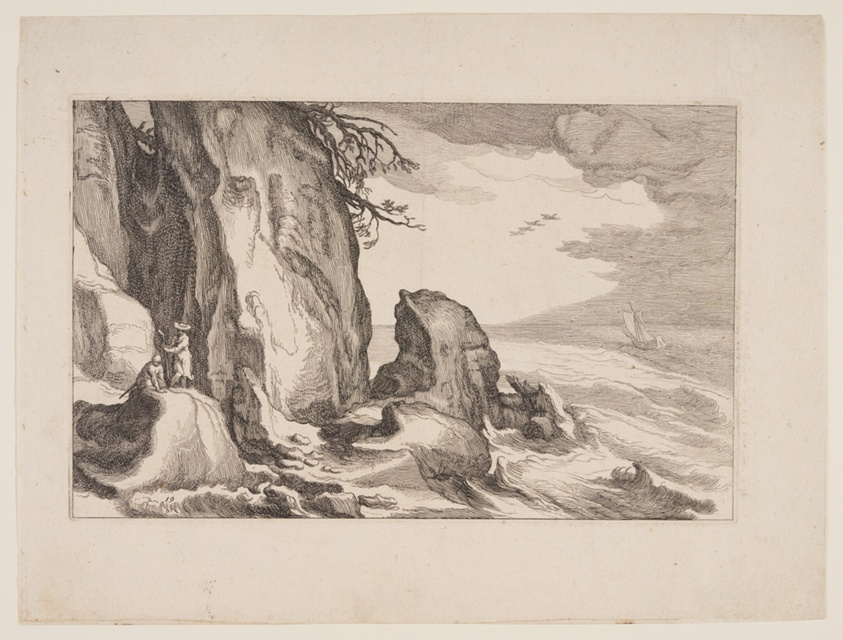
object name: Print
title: Plate 19, from Landscapes with Farmhouses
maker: Boëtius Adamsz. Bolswert (Flemish, 1580–1633); after Abraham Bloemaert (Dutch, 1566–1651)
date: 1614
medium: Etching on ivory laid paper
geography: Flanders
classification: print; paper; prints and drawing; etching